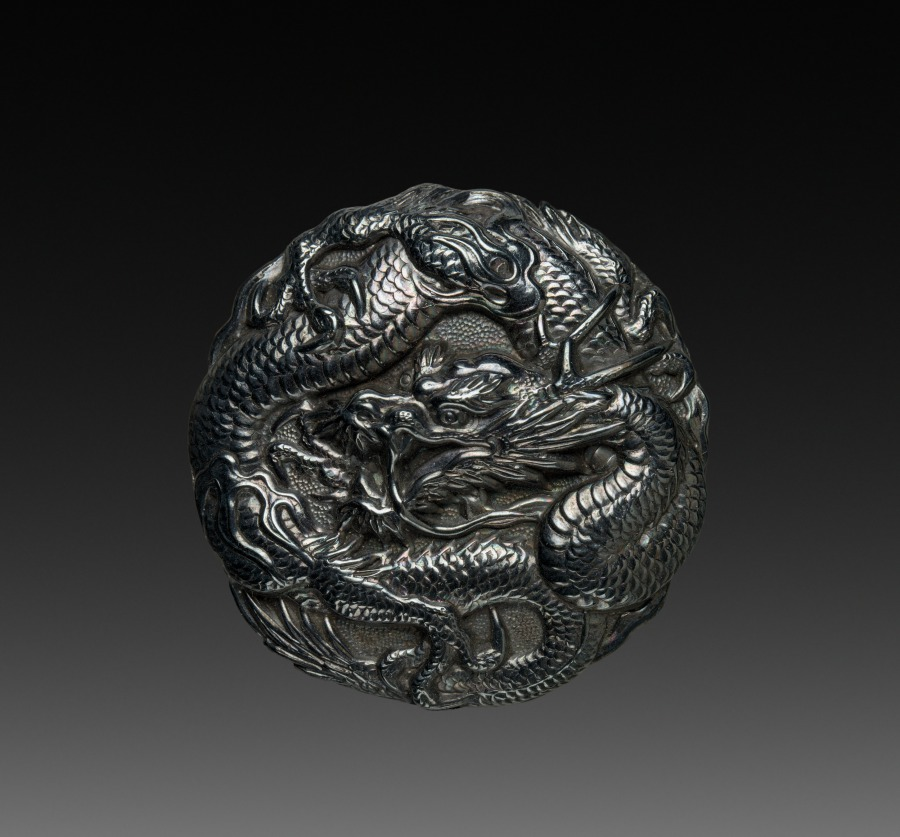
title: Button with Dragon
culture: Japan, Meiji period (1868–1912) to Taishō period (1912–26)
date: early 1900s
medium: One of a set of six buttons; cast (?) silver with relief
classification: Metalwork